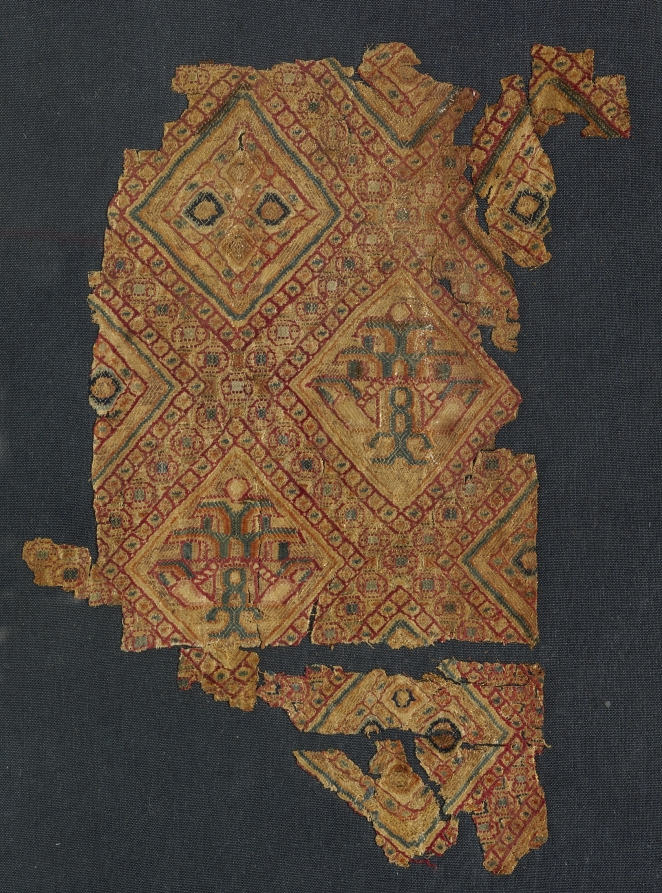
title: Fragment with jewel-like silk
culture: Iraq, probably Baghdad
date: 800s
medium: Silk: plain weave, brocaded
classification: Textile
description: This fragment is brocaded in a jewel-toned silks: red, rose, turquoise, salmon pink, pale pink, golden tan, green, dark blue, and dark brown. Flat strips of gold foil were wound on tan silk strands to create gold thread adding to the luxuriousness of the brocade.